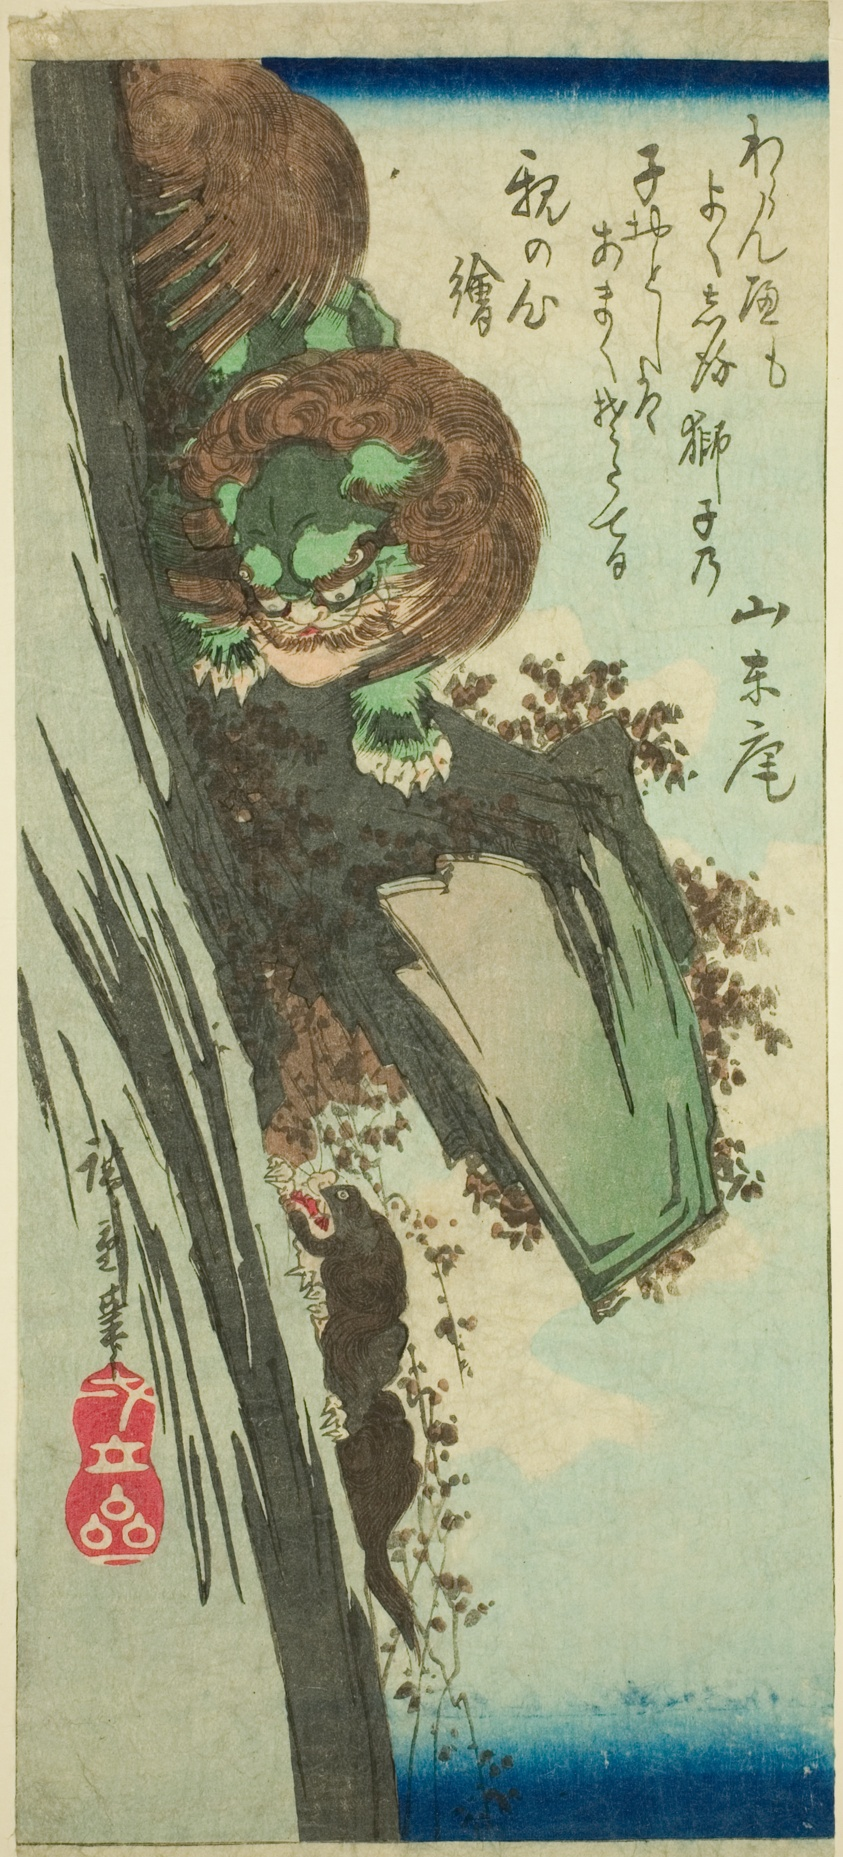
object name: Print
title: Lion training a cub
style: Japanese (culture or style)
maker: Utagawa Hiroshige 歌川 広重; Japanese, 1797-1858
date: c. 1840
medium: Color woodblock print; section of harimaze sheet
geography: Japan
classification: woodblock print; print; asian art